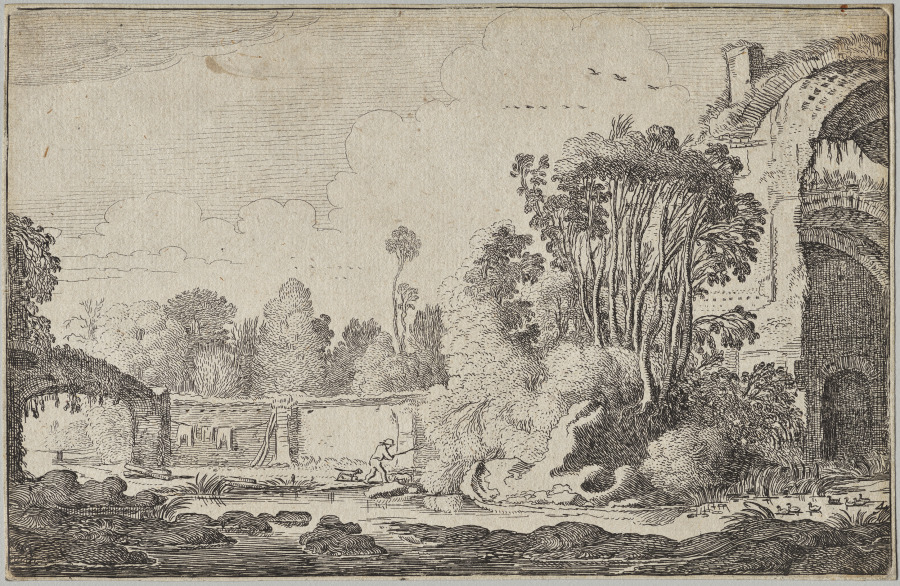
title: Landscapes, part III: Roman Ruins in Wooded Surroundings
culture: Netherlands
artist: Jan van de Velde (Dutch, 1620–1662)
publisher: Claes Jansz Visscher (Dutch, 1586/87–1652)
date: 1616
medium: etching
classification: Print